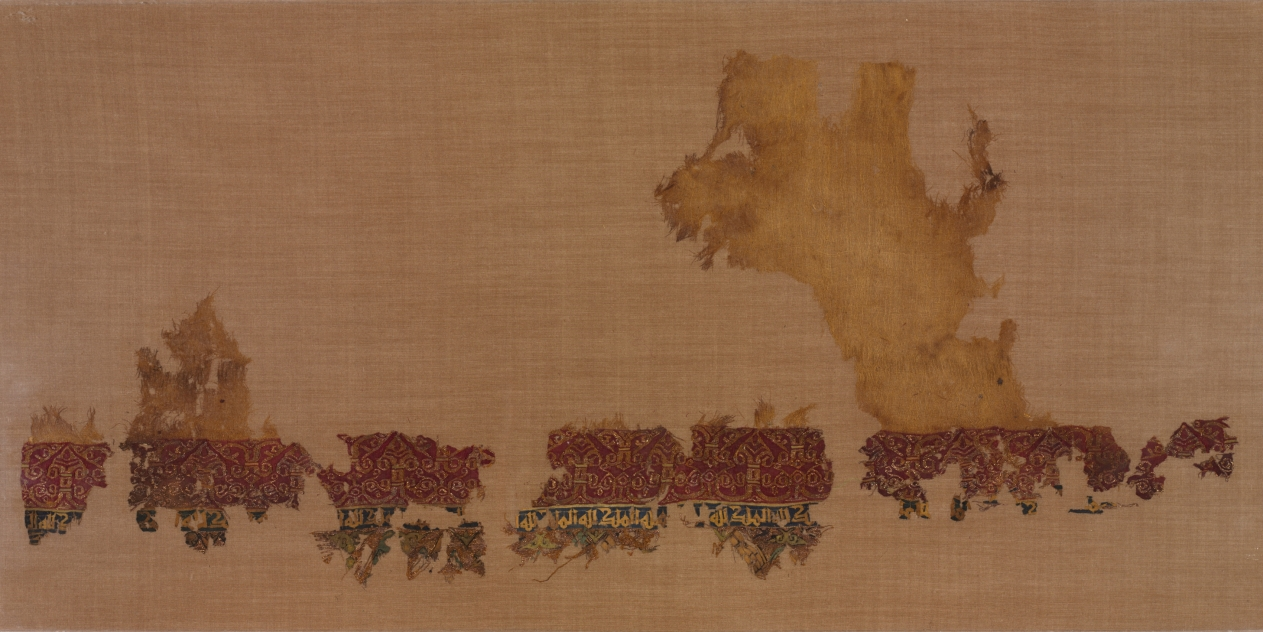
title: Tiraz with gold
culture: Egypt, Fatimid period, reign of Caliph al-Hakim, 1013–1020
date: 1013–1020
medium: plain weave with inwoven tapestry weave: linen, silk, and gold filé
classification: Textile